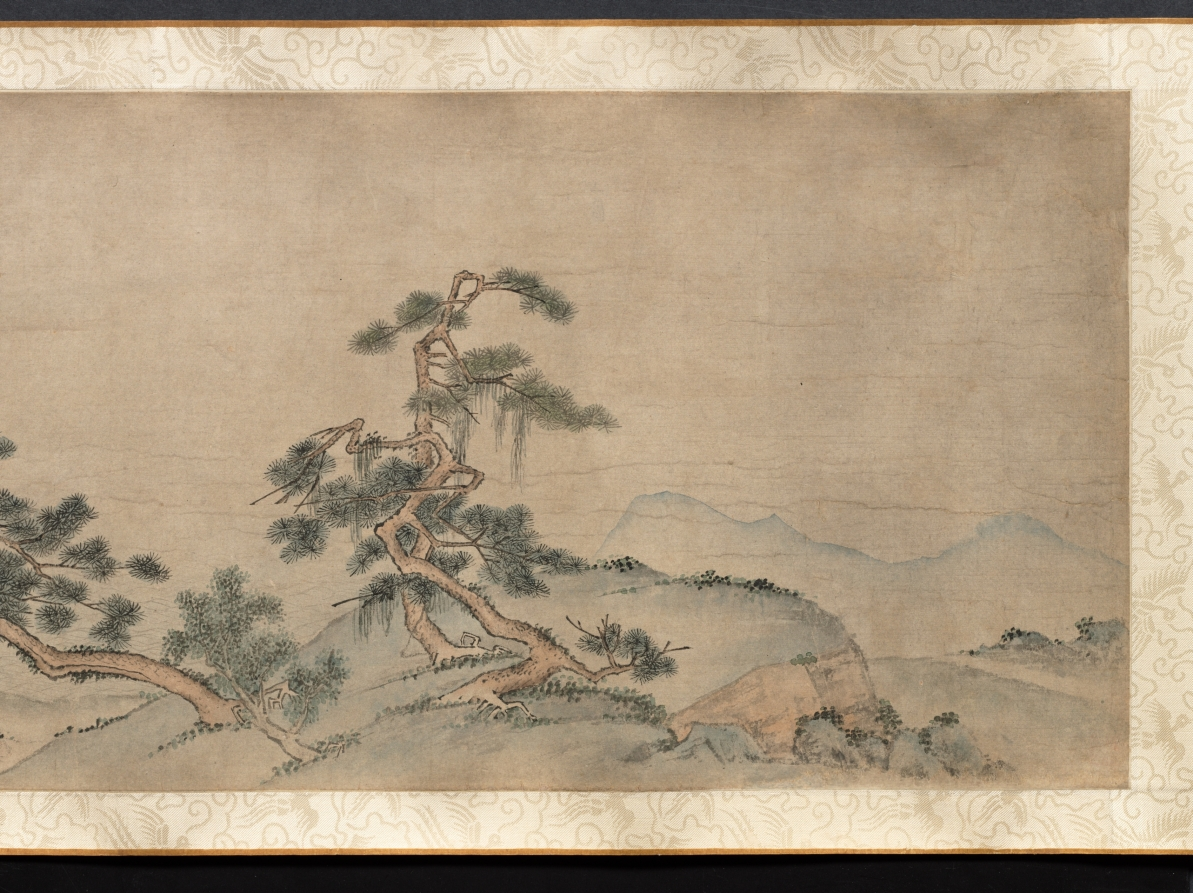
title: Ten Thousand Li of the Yangzi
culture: China, Ming dynasty (1368–1644)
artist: Dai Jin (Chinese, 1388–1462)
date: c. 1400s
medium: Handscroll; ink and color on paper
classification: Painting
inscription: Two colophons at end. Artist's seals: Dai Jin 戴進 and Wenjin 文進.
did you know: Dai Jin is traditionally considered the founder of the Zhe School, a style of landscape painting.